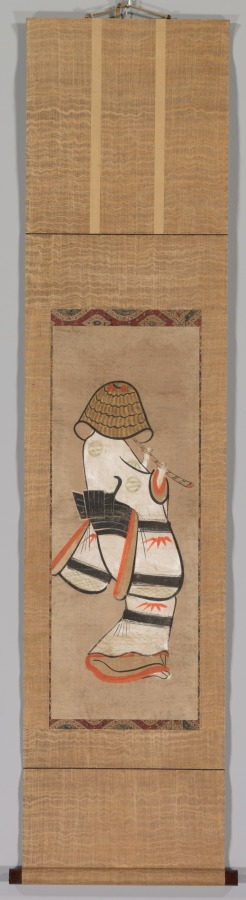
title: Woman as an Itinerant Monk: Onna Komuso (Otsu-e)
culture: Japan, Edo period (1615–1868)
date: late 1600s-early 1700s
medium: hanging scroll; ink and color on paper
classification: Painting